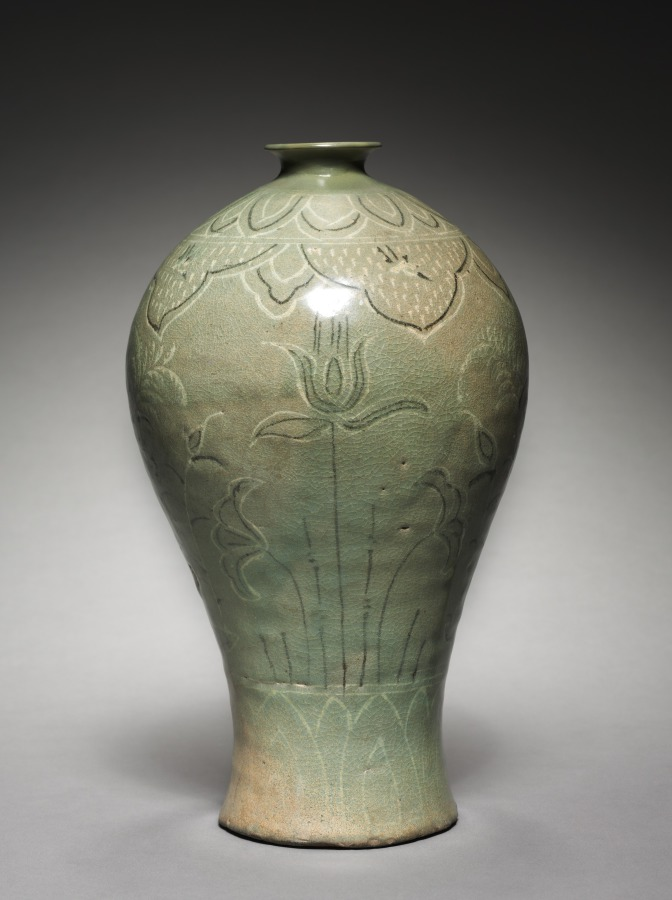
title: Prunus Vase with Inlaid Lotus and Reed Design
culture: Korea, Goryeo dynasty (918–1392)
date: 1300s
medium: Celadon ware with inlaid white and black slip decoration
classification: Ceramic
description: As early as the seventh century, the practice of drinking tea and wine became an important part of elite culture in Korea. Once used to store alcoholic beverages, this type of vase features a wide body followed by a sharply rounded shoulder, a short neck and a small opening. Most of the remaining examples no longer have a lid, but originally it may have had a lid that not only covers the opening, but also served as a cup.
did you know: Prunus vases are often believed to contain a branch of plum blossoms, but recent research reveals that these lidded vases were also used to contain cooking liquid such as sesame oil.